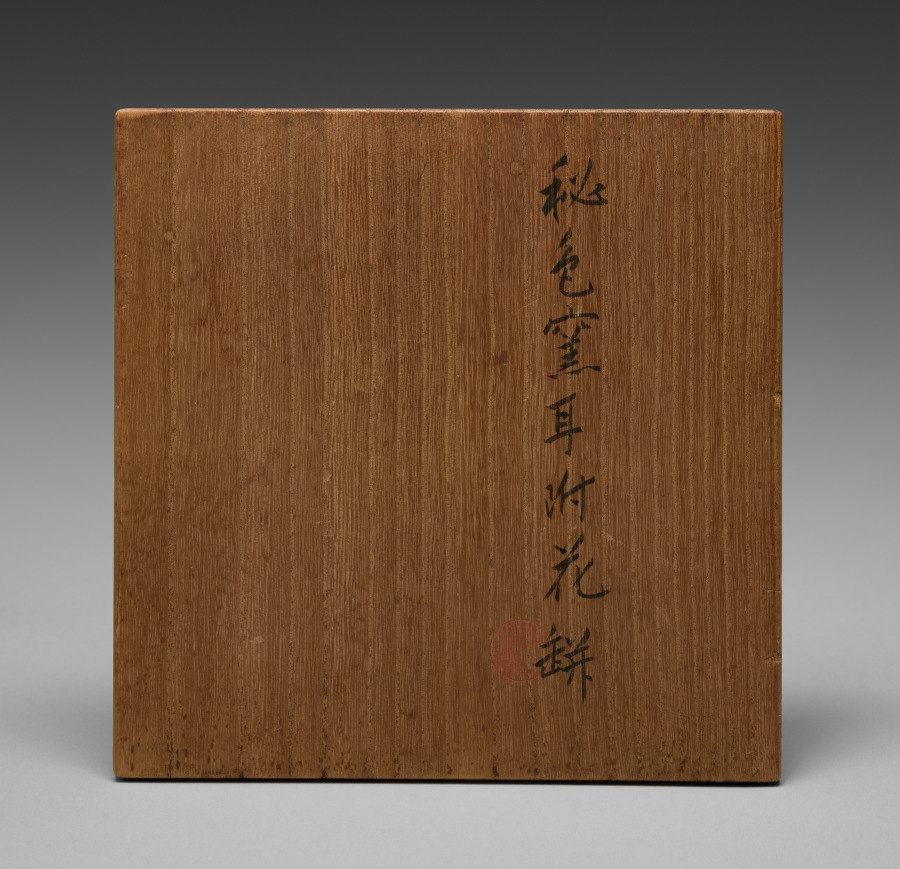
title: Hu-Shaped Vase with Handles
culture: Japan, Taishō period (1912–26) or Shōwa period (1926–89)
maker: Seifū Yohei IV (Japanese, 1872–1951)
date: 1914–46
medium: Porcelain with molded and carved design and green glaze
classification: Ceramic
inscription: 清風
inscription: 成山清風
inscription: 清風造【印】清風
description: Many of the vases created by Yohei III and IV were made with reference to and in emulation of Chinese ceramics in both form and glazing. The Seifu studio was inspired by later Chinese copies of two other archaic vessel types, the hu (Japanese ko) and guan (Japanese kan). In simple terms, in their original contexts, the hu and guan were storage jars that also appeared in ritual contexts. This hu-form vase by Yohei IV has a green glaze and handles in the shape of an elephant head. The details of the elephant heads are quite easy to miss, but a close look reveals that each has carved eyes with pupils defined, tiny ears and tusks in very low relief, and a curved trunk with the end curled up. This sort of container is even known as the “elephant ear” type. The only other decorative element on the vase’s pear-shaped body is a raised cordlike band around the shoulders.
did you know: The handles are shaped like elephant heads.